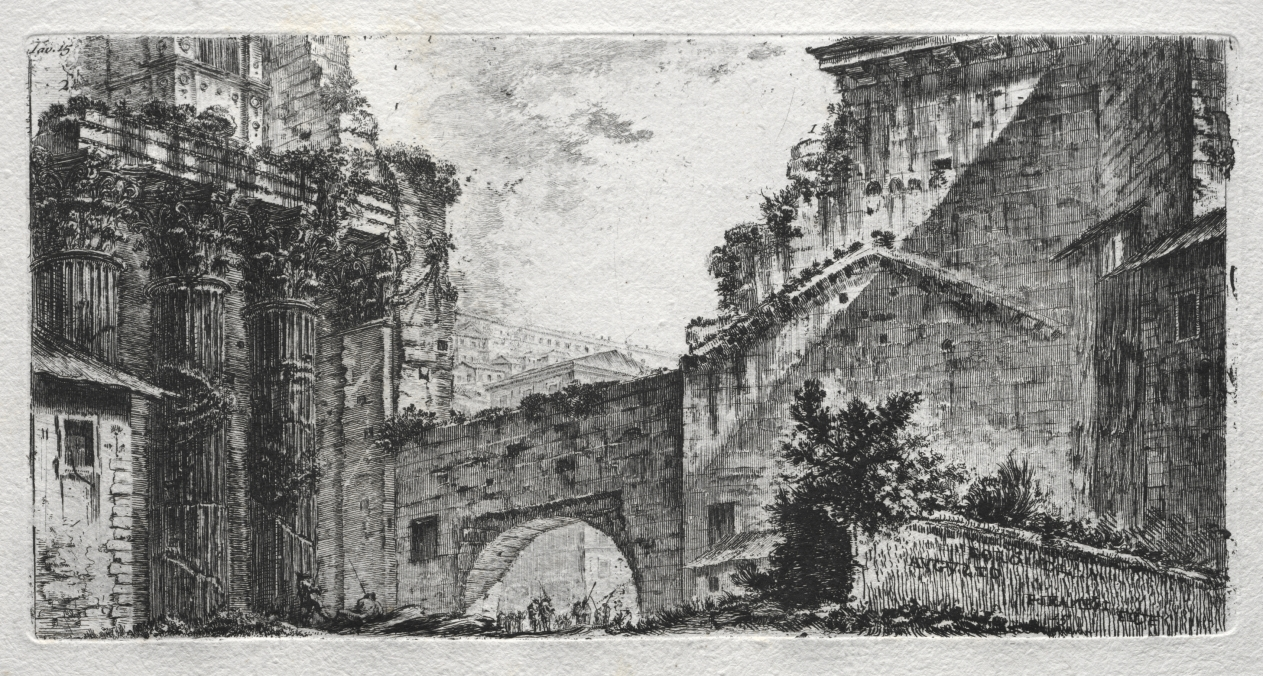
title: Foro di Augusto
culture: Italy, 18th century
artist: Giovanni Battista Piranesi (Italian, 1720–1778)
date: c. 1748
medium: etching and engraving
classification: Print